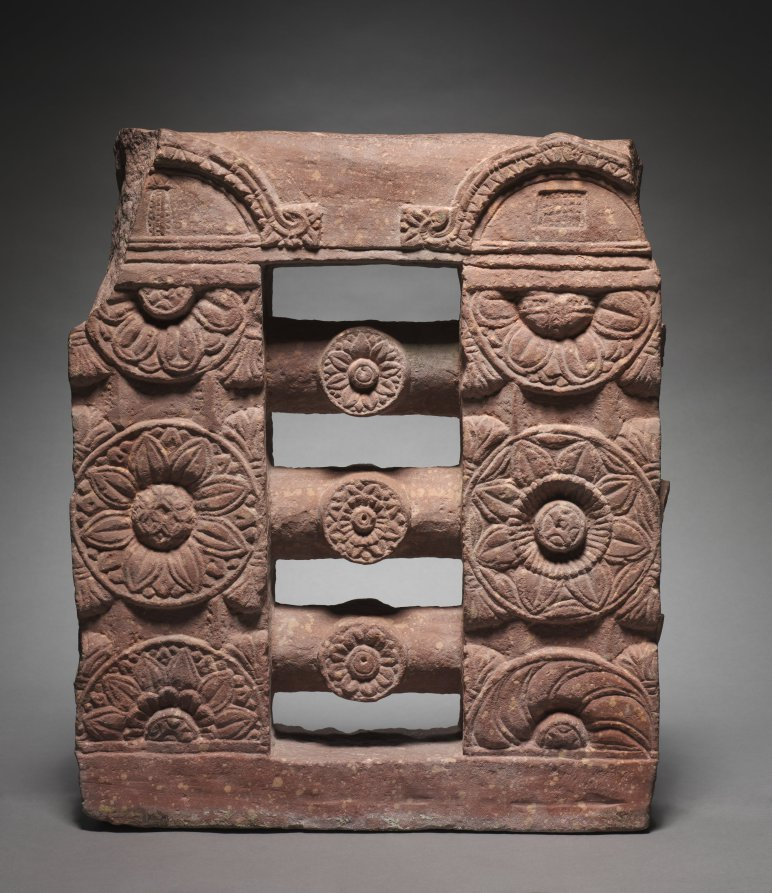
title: Section of Monolithic Railing with Bather and Lotus Medallions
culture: India, Mathura, Kushan period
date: c. 150–250 CE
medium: red sandstone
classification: Sculpture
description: Railings demarcated a sacred space, such as a tree shrine or a stupa. Images associated with purifying waters were carved on the railings, as if to symbolically cleanse those who passed through the gate. Under a fruit-bearing tree is a young woman squeezing water from her hair. In a visual depiction of an ancient Indian poetic trope, a goose mistakes the drops of water for pearls and comes to eat them.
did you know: In the windows above, carved on the coping stone, are two voyeurs and a bowl made of leaves filled with flower garlands, which would be used to adorn the sacred site.